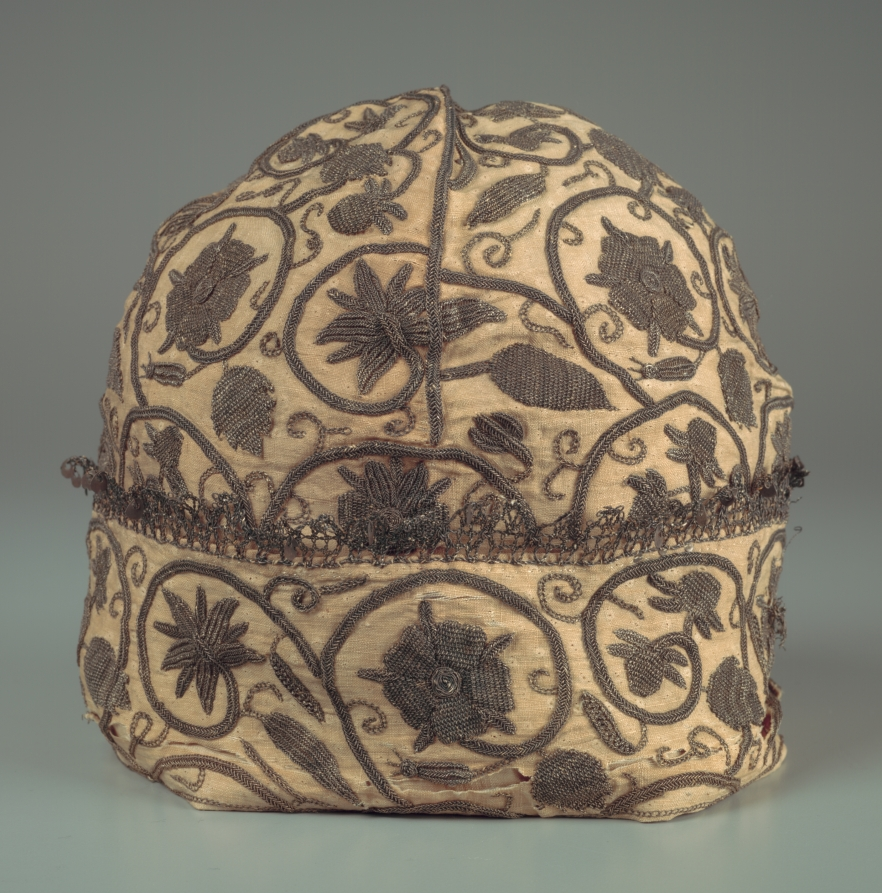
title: Man's Nightcap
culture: England, Elizabethan Period, late 16th century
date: late 1500s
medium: Silk, silver thread, plaited braiding, linen; embroidery: chain and buttonhole stitches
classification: Embroidery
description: According to Elizabethan embroidery scholar Jacqui Carey, this man’s nightcap is constructed of a single piece of embroidered, plain weave linen, cut and folded as is typical of the period. The four points cut into the top edge of the fabric are joined to form the crown while the lower edge is folded back to create the brim. The top edge of the brim is trimmed with bobbin lace. The seams on the crown are hidden with decorative stitching. The floral motifs (rose, borage, pansy and strawberry) set within coiling stems and foliage also is typical of the period. The embroidered motifs are worked with silver metal thread (thin metal strips wrapped around a white silk core). The design is the same in each quadrant. Eight different stitches are used on the nightcap, inclding Elizabethan plaited braid stitch (standard version), Elizabethan plaited braid stitch (variation two), chain stitch, Elizabethan double looped edging (on chain stitch), Elizabethan corded detached buttonhole stitch, Elizabethan spider’s web, five-spoke Elizabethan spider’s web, Elizabethan double ladder with filling, and Elizabethan double Ceylon.